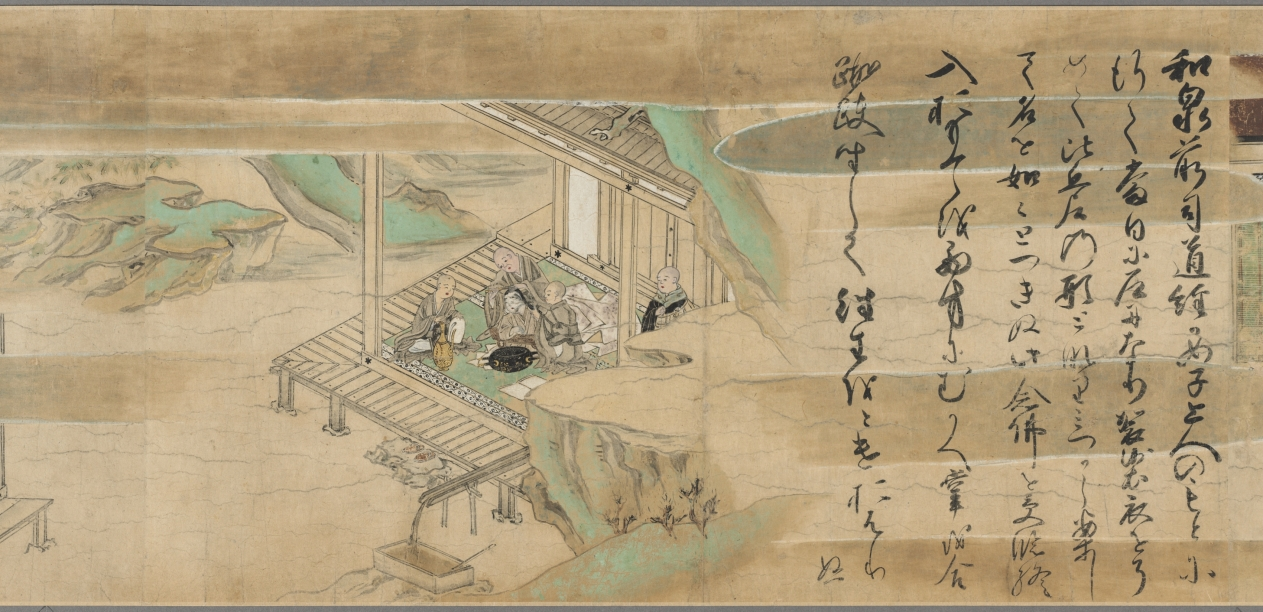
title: The Illustrated Miraculous Origins of the Yūzū Nenbutsu School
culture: Japan, Kamakura period (1185–1333)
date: early 1300s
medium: Handscroll; ink, color, and gold on paper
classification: Painting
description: This painting is the second of a set of two illustrated handscrolls. The first scroll depicts the biography of the Japanese Buddhist monk Ryōnin. This scroll begins with scenes of Ryōnin’s death and relates episodes illustrating the efficacy of following his teachings. Ryōnin asserted the total interconnectedness of all things and the spiritual benefit of chanting the name of the Buddha Amida for one another.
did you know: The other scroll from this two-scroll set belongs to the Art Institute of Chicago.